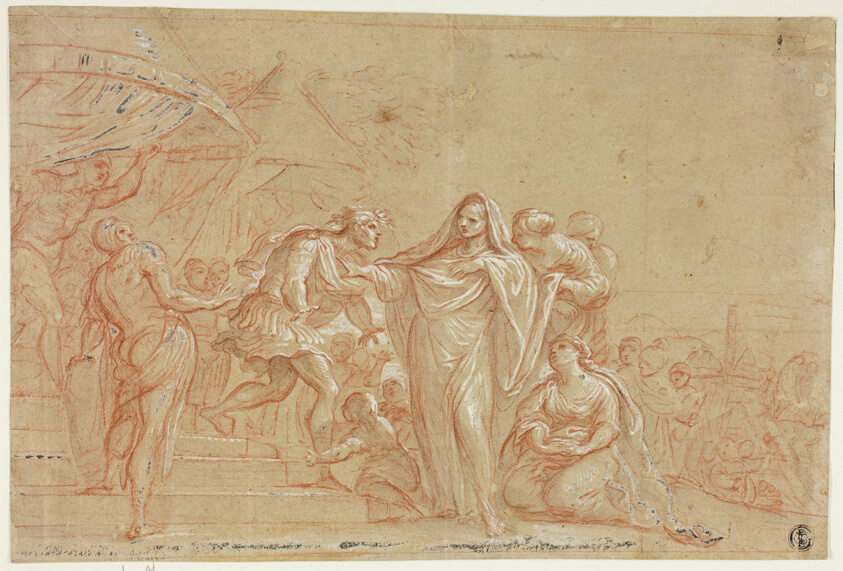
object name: Drawing and Watercolor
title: Coriolanus with Veturia and Volumnia at the Volscian Camp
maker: Circle of Agostino Masucci (Italian, c. 1691-1758); or Philippe de Champaigne (French, 1602-1674)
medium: Red chalk with brush and gray-brown wash, with traces of black chalk, heightened with lead white (partly discolored), on tan laid paper with blue fibers, laid down on cream laid paper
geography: Italy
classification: chalk; drawings (visual works); prints and drawing